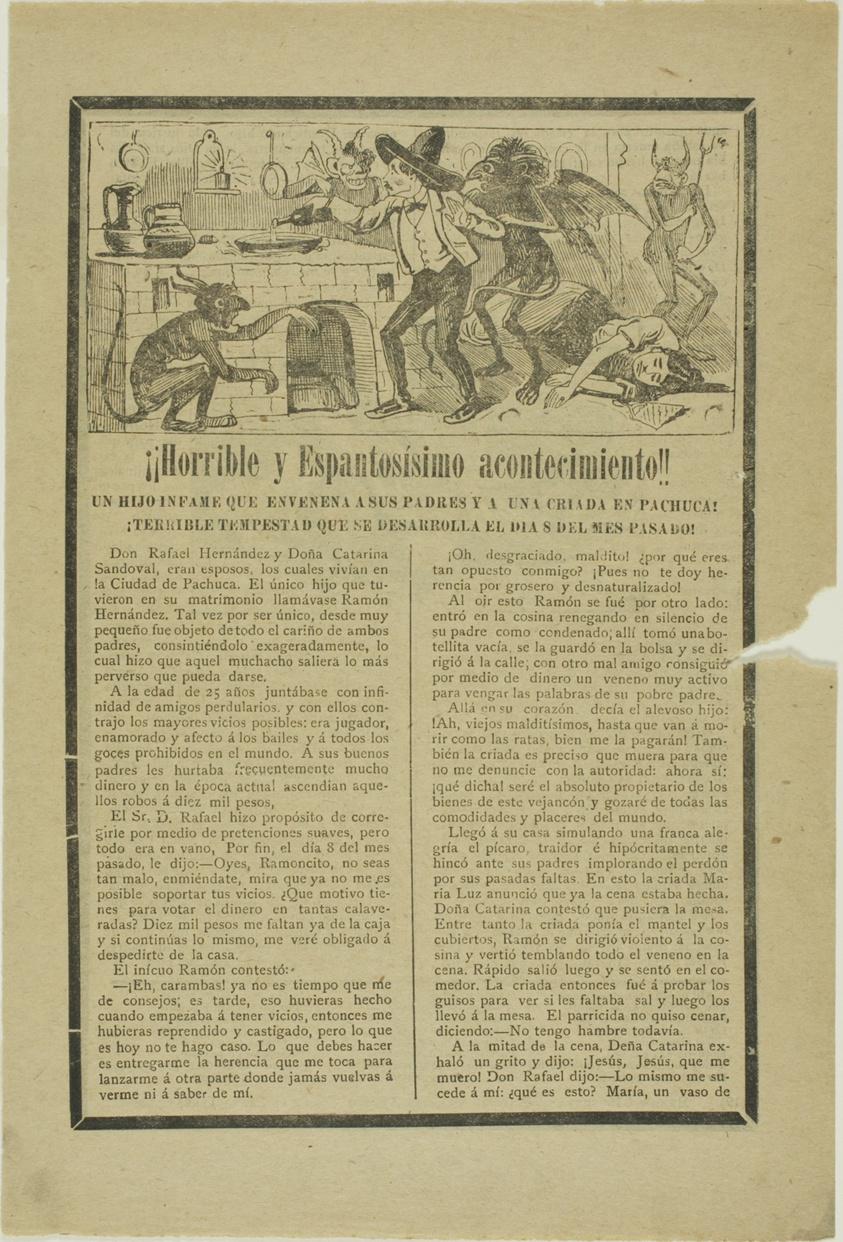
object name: Print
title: Horrible and Frightening Event!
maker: José Guadalupe Posada (Mexican, 1852-1913)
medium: Relief etching on paper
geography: Mexico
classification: relief etching; print; prints and drawing